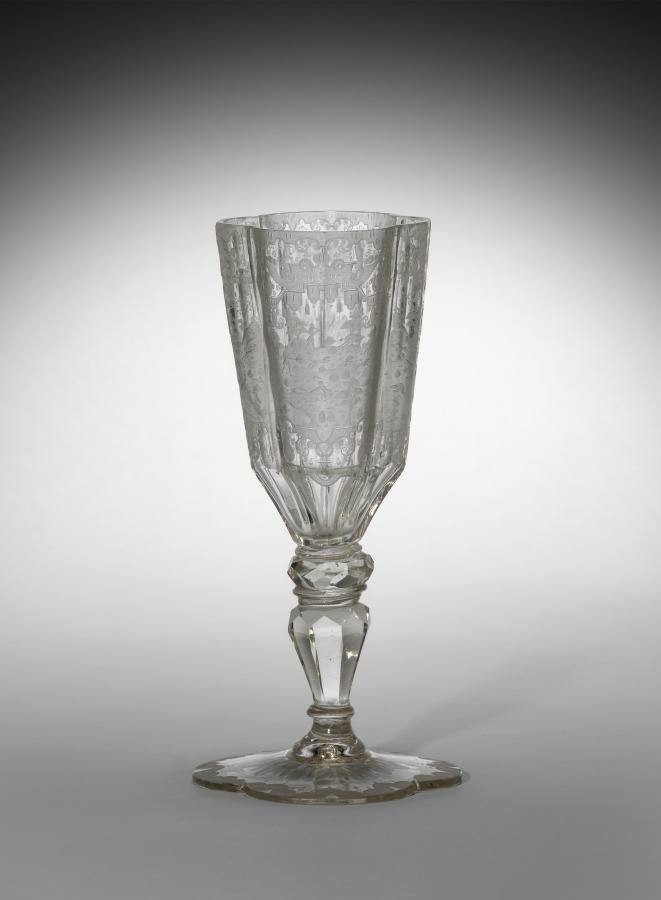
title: Standing Cup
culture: Germany, Silesia, 18th century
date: c. 1725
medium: glass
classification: Glass